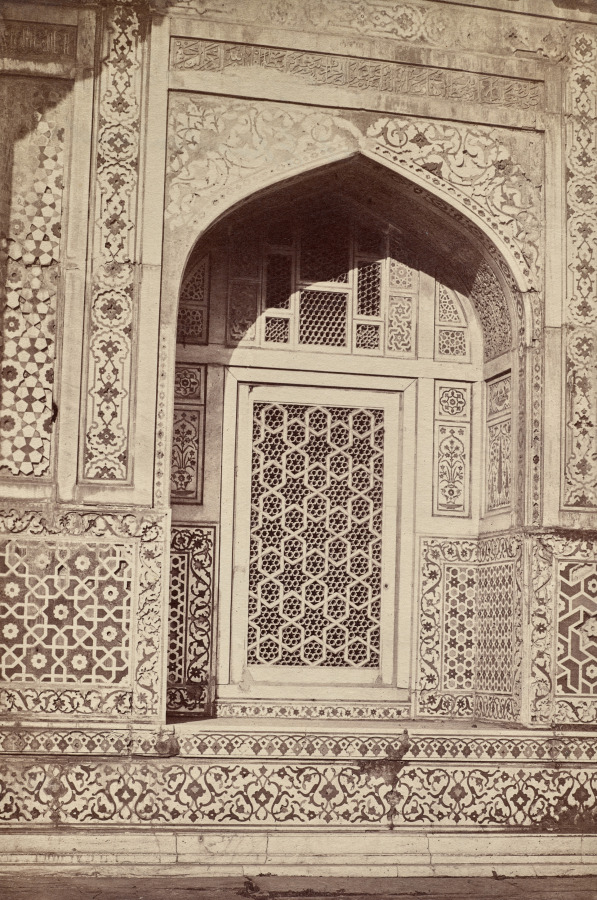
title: Untitled (Jama Masjid, Delhi)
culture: England, 19th century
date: 1870s (?)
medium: albumen print mounted on an album page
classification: Photograph